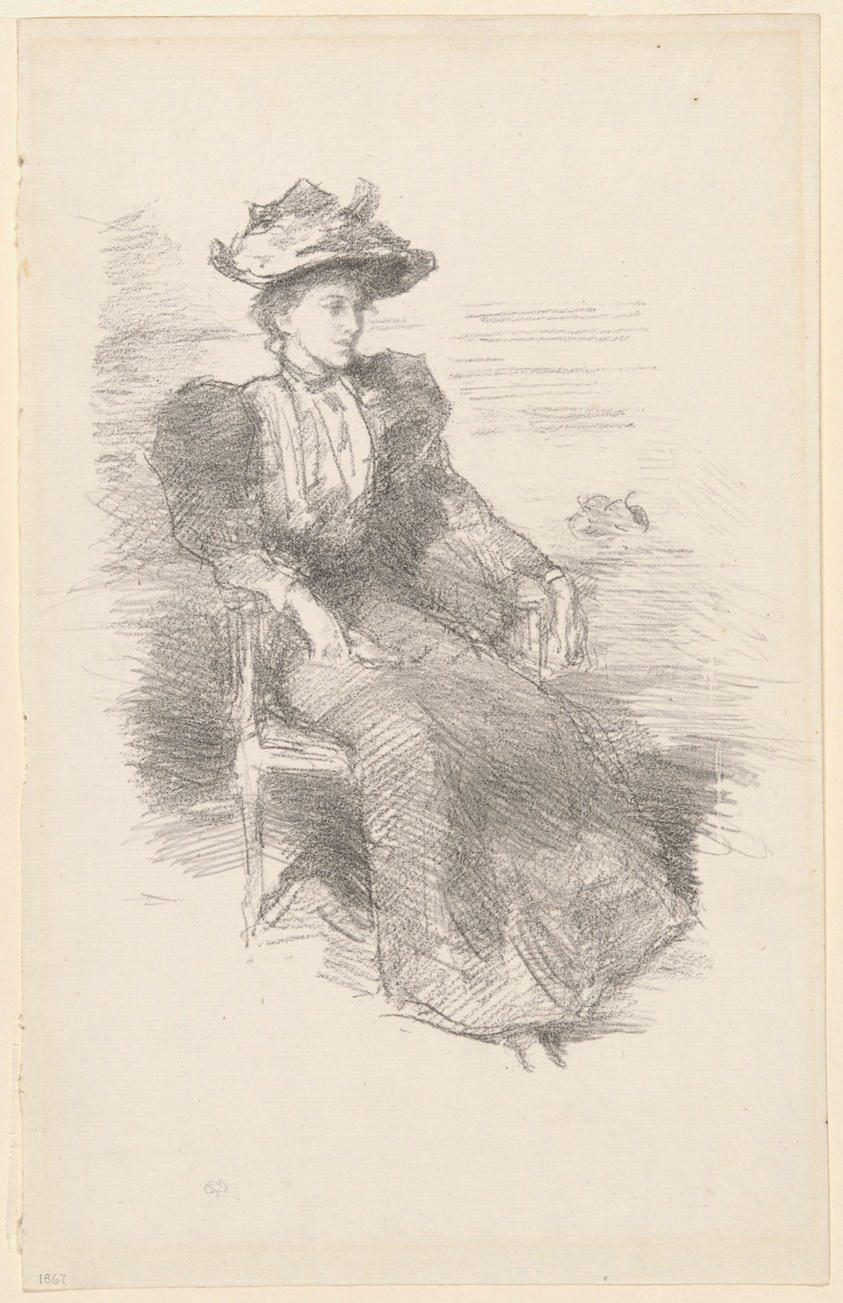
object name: Print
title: A Portrait: Mildred Howells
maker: James McNeill Whistler (American, 1834-1903)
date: 1894/96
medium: Transfer lithograph in black with scraping, on ivory laid paper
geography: United States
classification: transfer lithograph; lithograph; print; prints and drawing; paper